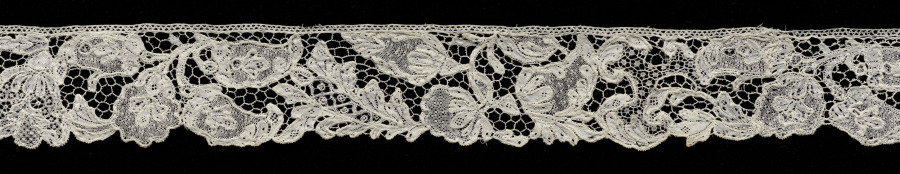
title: Lace Edging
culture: France, Alençon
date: 1700–1740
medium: Linen: needle lace (Point d'Alençon)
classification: Lace